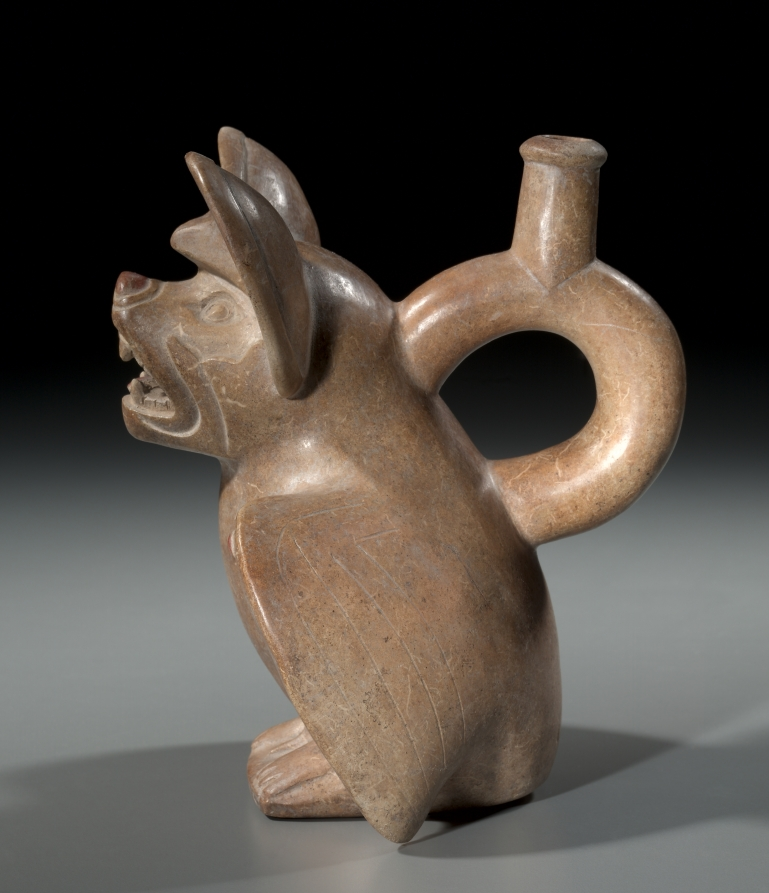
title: Big-Eared Brown Bat Vessel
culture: Central Andes, North Coast, Moche people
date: 200–850 CE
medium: ceramic, slip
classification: Ceramic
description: This bat, perhaps shown opening its wings before taking flight, illustrates Moche artists’ keen interest in realism and in capturing activity at its peak. Moche bat symbolism may be linked to the animal’s paradoxical traits—for instance, bats fly but have fur rather than feathers. Such traits may have caused the Moche to link bats with transitional states, such as the passage between life and death. The vessel depicts a member of the Histiotus mochica species, a big-eared brown bat that researchers described in 2021 and, due to this vessel, named in honor of the Moche, also known as the Mochica.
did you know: This vessel depicts a big-eared brown bat.